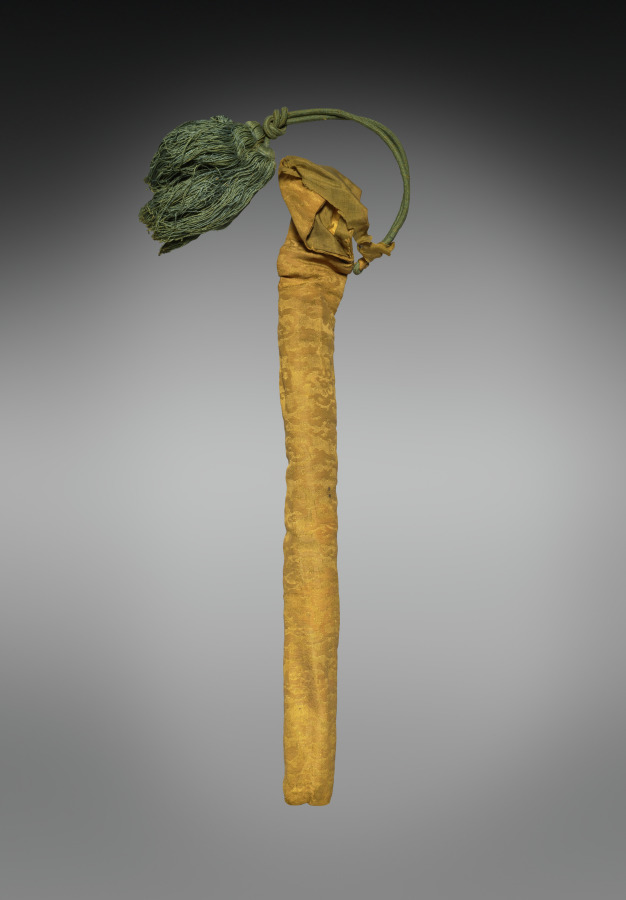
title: End-blown Flute (Hitoyogiri)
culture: Japan, Meiji period (1868–1912)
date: late 1800s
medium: Lacquered bamboo with gold and silver maki-e (sprinkled powder designs)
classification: Musical Instrument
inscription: 篠本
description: The hitoyogiri 一節切 is considered one type of shakuhachi 尺八 bamboo flute and was popular in the 16th and 17th centuries. It is smaller and of weaker sound than the better known fuke 普化, and was thus known as a "small bamboo" or kotake 小竹, during a brief 19th-century revival. The node of the bamboo is positioned between the four finger holes on the front, and the thumb hole at the top of the back. This one has a design of cherry blossoms and scattered petals.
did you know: The name of this flute, hitoyogiri 一節切 comes from the fact that it has a single node in the bamboo from which it is made.